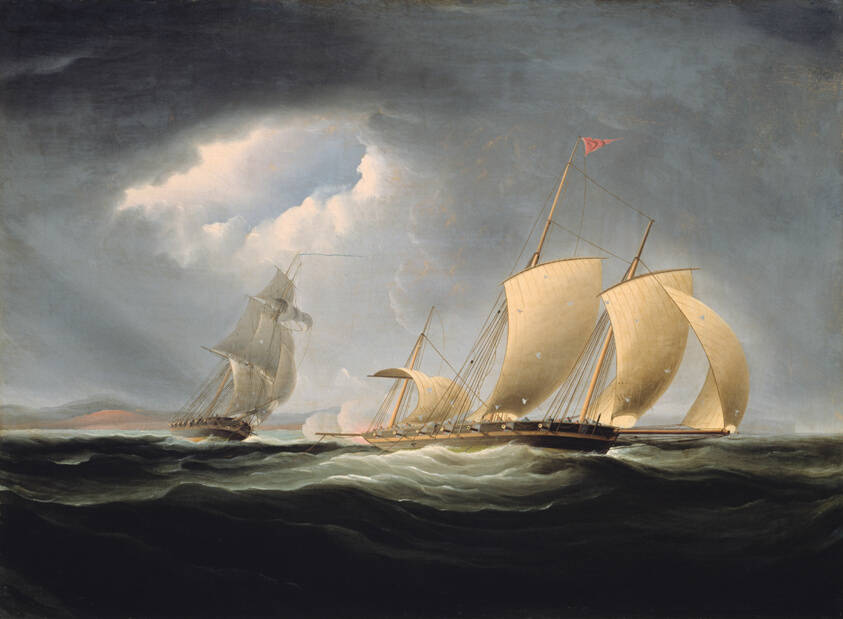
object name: Painting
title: Capture of the Tripoli by the Enterprise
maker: Thomas Birch (American, born England, 1779–1851)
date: 1806–12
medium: Oil on canvas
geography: Philadelphia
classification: painting; american arts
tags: landscapes